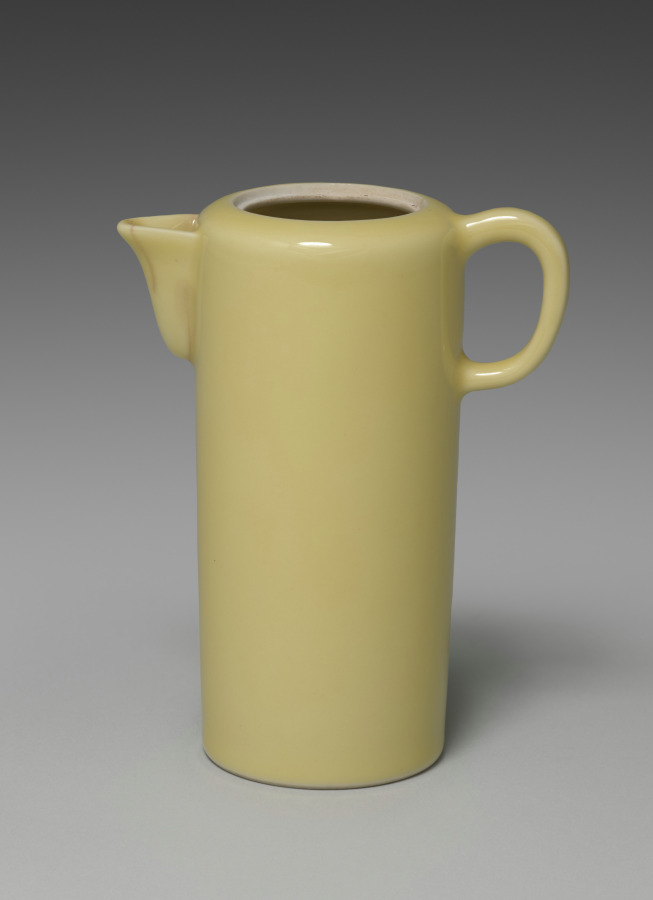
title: Sake Pourer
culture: Japan, Taishō period (1912–26) or Shōwa period (1926–89)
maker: Seifū Yohei IV (Japanese, 1872–1951)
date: 1914–46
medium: Porcelain with yellow glaze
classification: Ceramic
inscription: 清風造 。 【印】 清風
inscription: 成山清風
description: Like his father, Yohei IV also produced works with red or yellow monochrome glazes. His yellow-glazed works include this pair of sake pourers, a set of five drinking cups CMA 2022.217, and a sweets bowl molded into the shape of a chrysanthemum CMA 2022.218.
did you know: The lid's handle is made of bamboo.